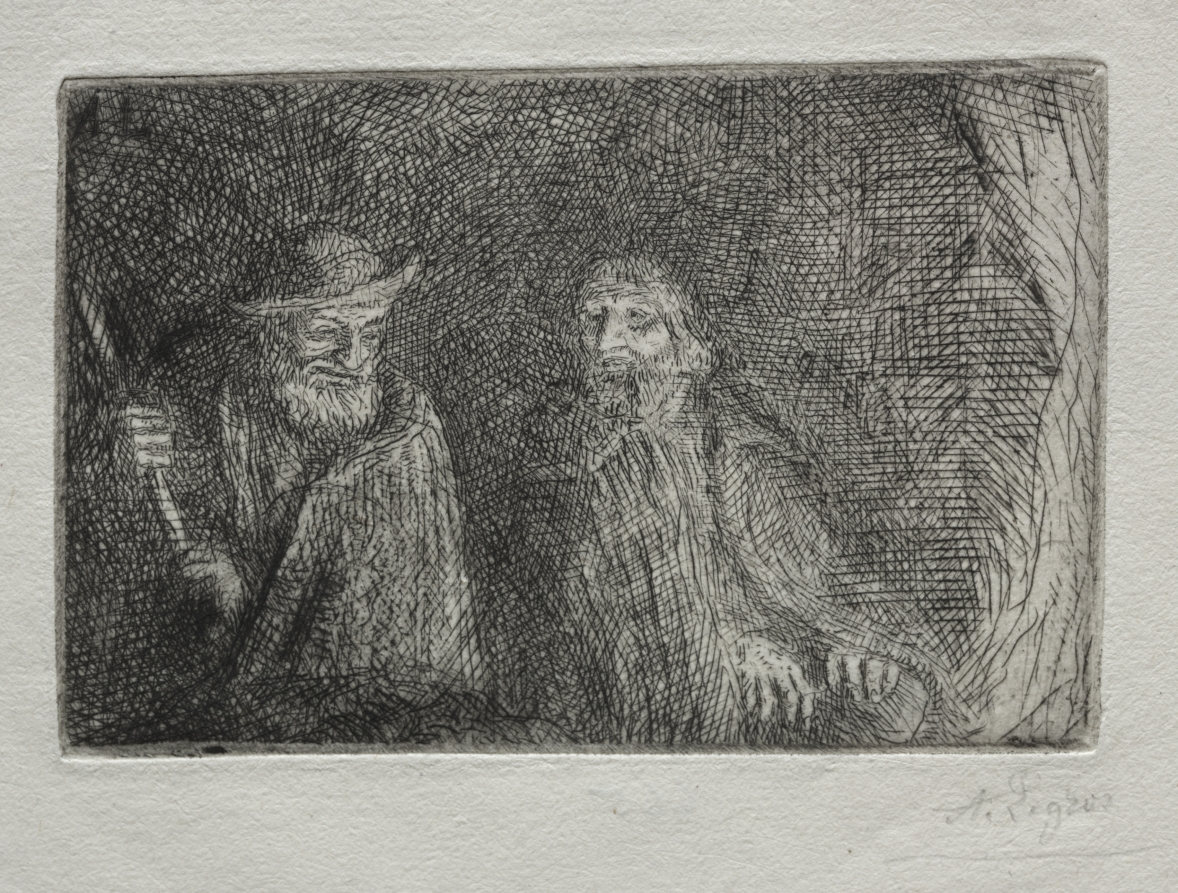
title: Two Shepherds (Les Deux Bergers)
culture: France, 19th-20th century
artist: Alphonse Legros (French, 1837–1911)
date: c. 1857–1911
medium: etching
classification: Print